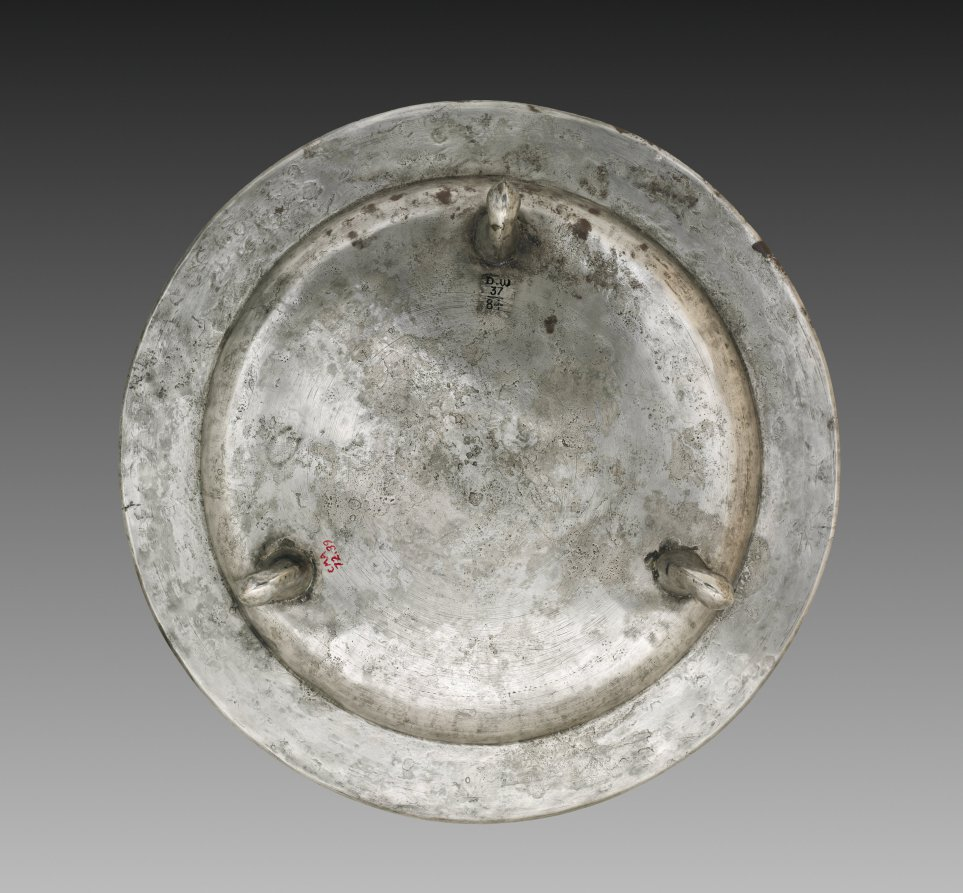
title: Footed Platter with Design of Mythical Beasts amid Grapevines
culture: China, Tang dynasty (618–907)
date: 700s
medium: silver with gilt, incised, and chased decoration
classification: Silver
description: Precious Sassanian and Central Asian metalwork had been imported to China as early as the 4th and 5th centuries as a result of wars and prosperous trade along the Silk Road. With the influx of foreign metalworkers to cosmopolitan Tang China, the techniques of sheet metalworking were introduced to the Chinese. This silver vessel demonstrates the effects of such east-west exchanges along the Silk Road. Its decoration with intricate gilt, incised and chased designs against a ring-punched ground is of a particularly high standard.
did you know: The footed tray, a foreign shape, is decorated with fantastic creatures frolicking among grapevines, a motif borrowed from Roman art.